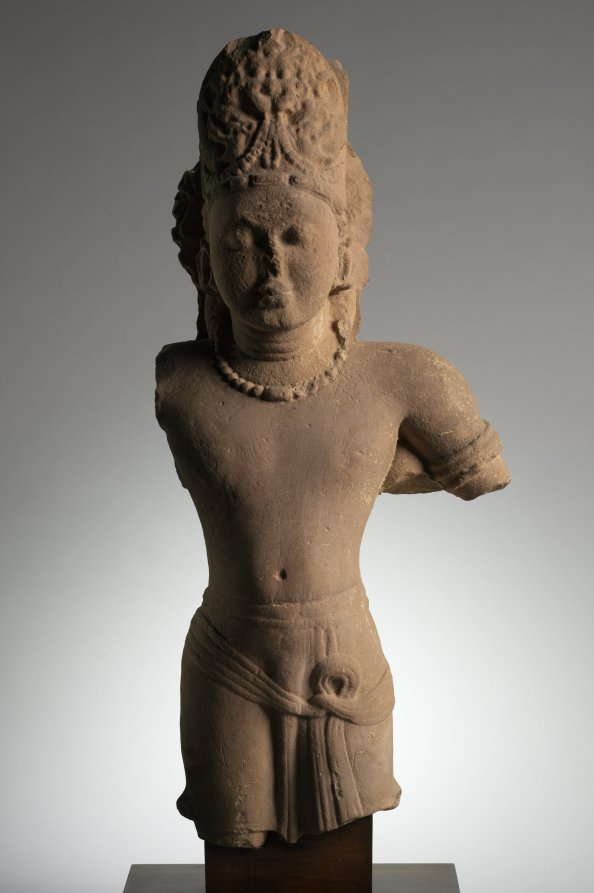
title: Vishnu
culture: Central India, Gupta Period, 5th Century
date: late 400s CE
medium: sandstone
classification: Sculpture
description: This sculpture of the Hindu god Vishnu once had four arms, indicating his superhuman power. The smooth contours of the body and placid expression betoken a new vision for images of divinities in South Asia, characterized by restrained elegance. The scarf tied loosely around his hips curves gracefully under its own weight, emphasizing his passive immobility, since it would come undone if he were to move.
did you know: Strings of jewels spew from the mouth of the leonine face (kirtimukha) in the center of the crown: a mark of glory.